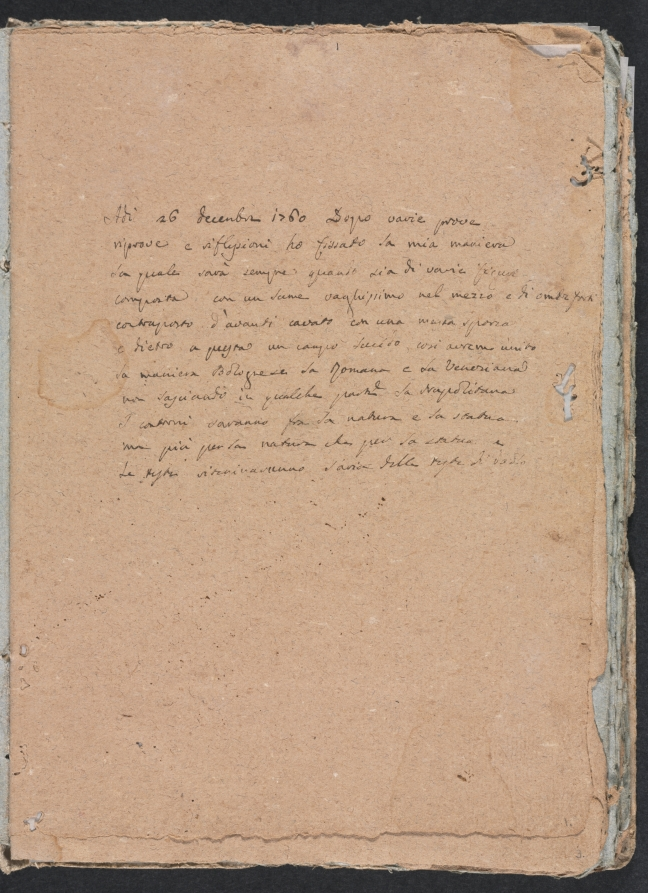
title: Verona Sketchbook: Inscription (page 1)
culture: Italy, 18th century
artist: Francesco Lorenzi (Italian, 1723–1787)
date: 1760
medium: black ink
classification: Bound Volume